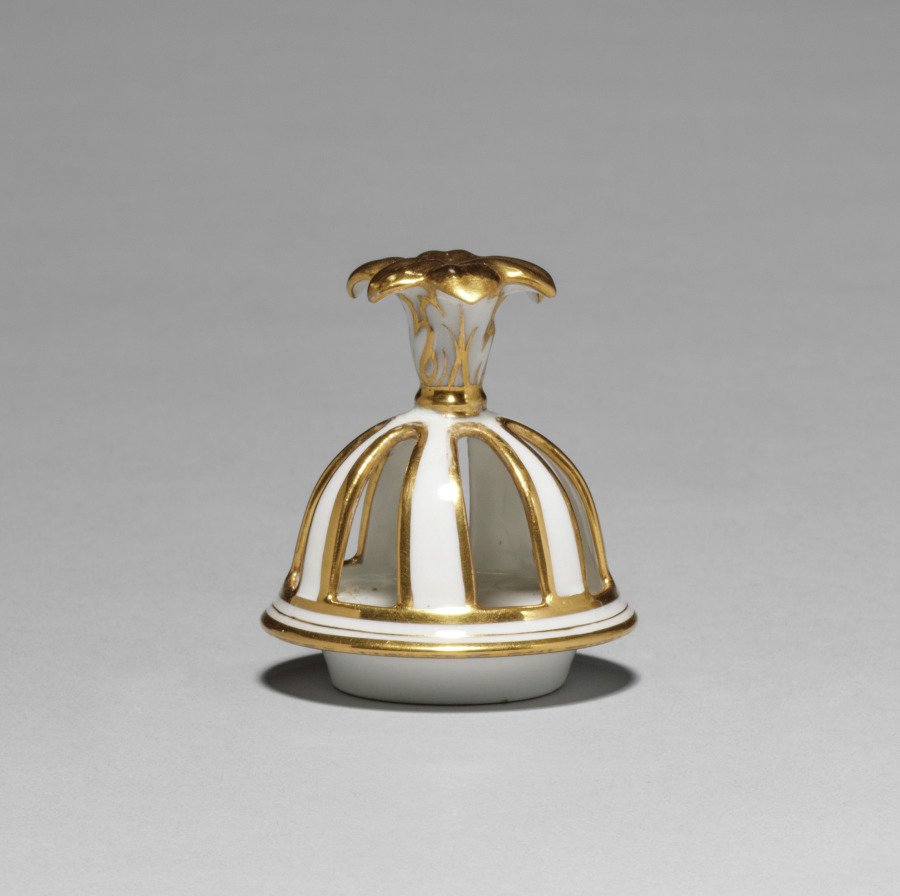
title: Urn (cover)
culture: England, Worcester, 19th century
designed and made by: Flight, Barr and Barr (British)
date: c. 1815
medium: artificial porcelain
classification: Ceramic